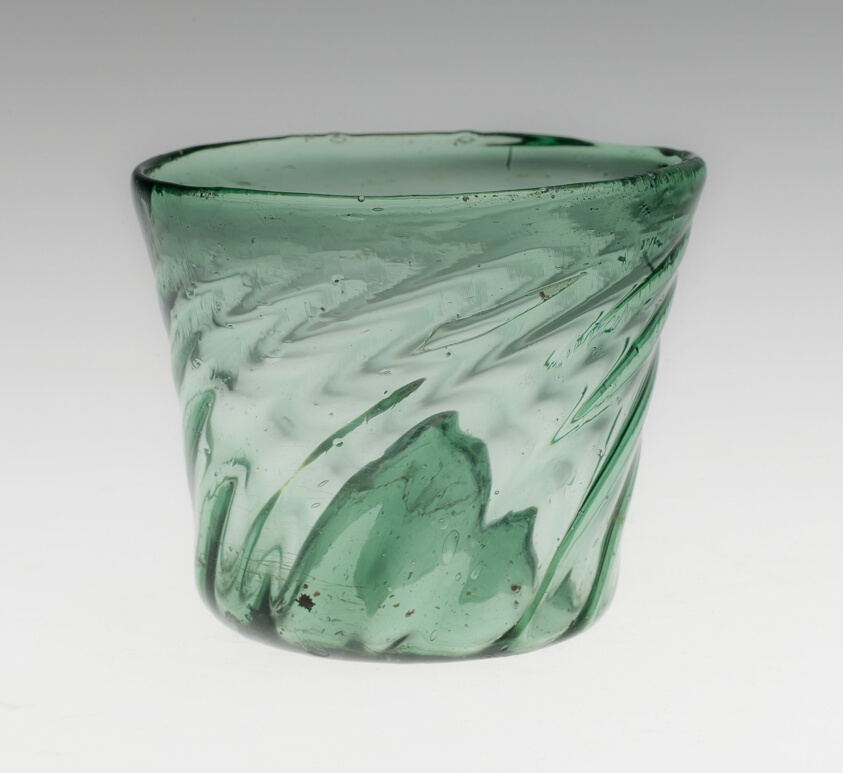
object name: Glass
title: Beaker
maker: German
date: c. 1500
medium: Green glass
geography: Germany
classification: glass; european decorative arts